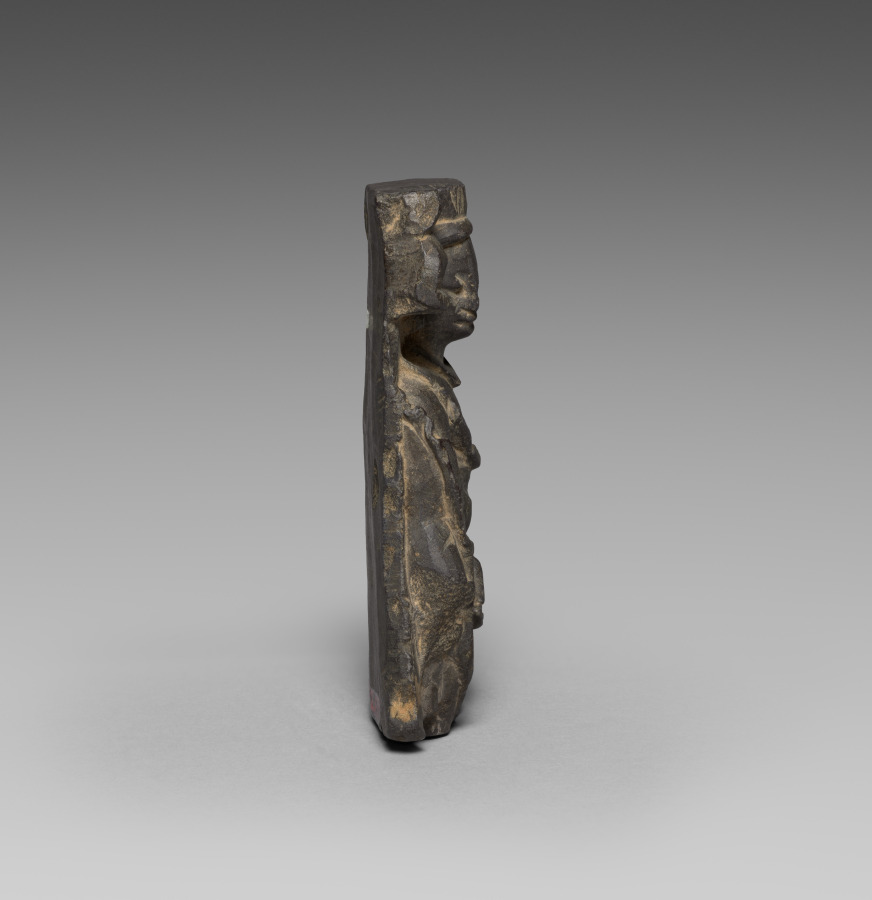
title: Male Figure, Possibly Indra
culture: Pakistan, Gandhara, possibly Swat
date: 300s–400s CE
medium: schist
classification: Sculpture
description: This carving appears to be unfinished, showing only the broad strokes of the male figure. The flat-topped crown is characteristic of Indra, which may be the identity of this figure.